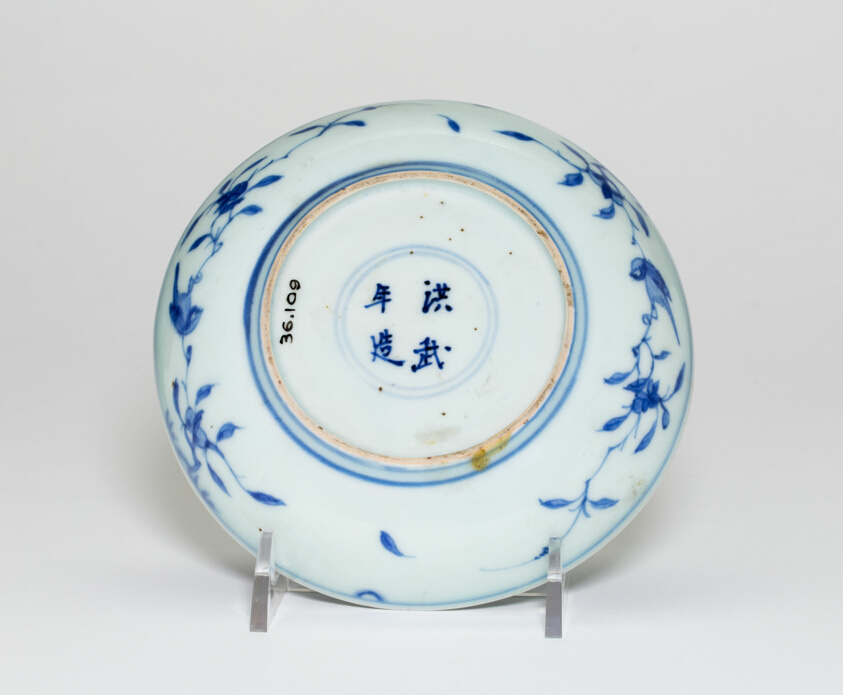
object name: Vessel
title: Plate with Figures on a Boat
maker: China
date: Ming dynasty (1368–1644) Hongwu reign mark and period (1368–1398)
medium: Porcelain painted in underglaze blue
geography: China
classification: porcelain; ceramics; asian art